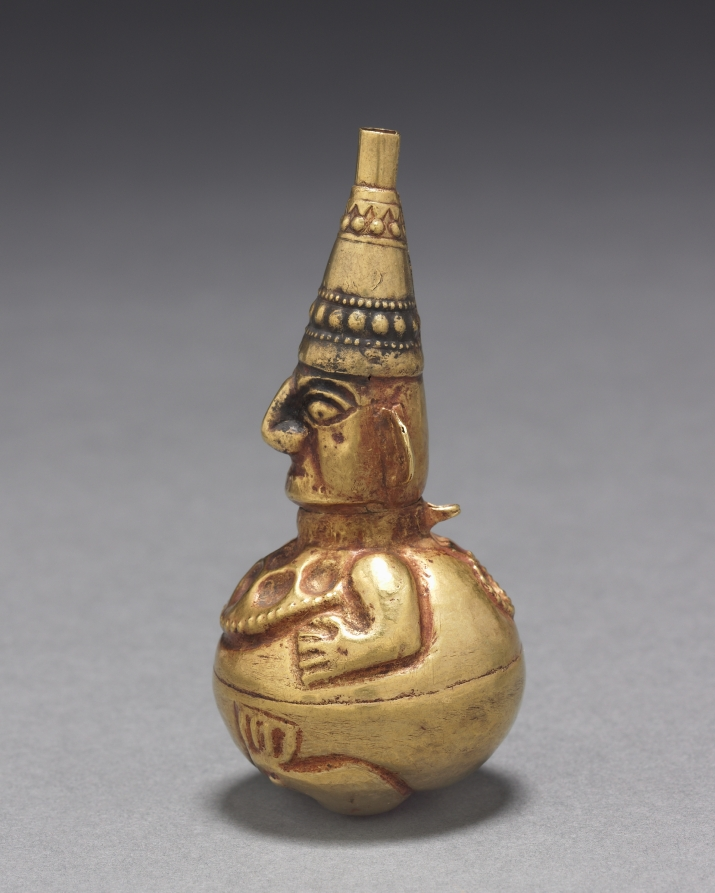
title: Figural Flask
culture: Peru, North Coast, Lambayeque Valley, Sicán or Chimú, 9th-15th Century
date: c. 800–1470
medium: hammered and embossed gold alloy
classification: Metalwork